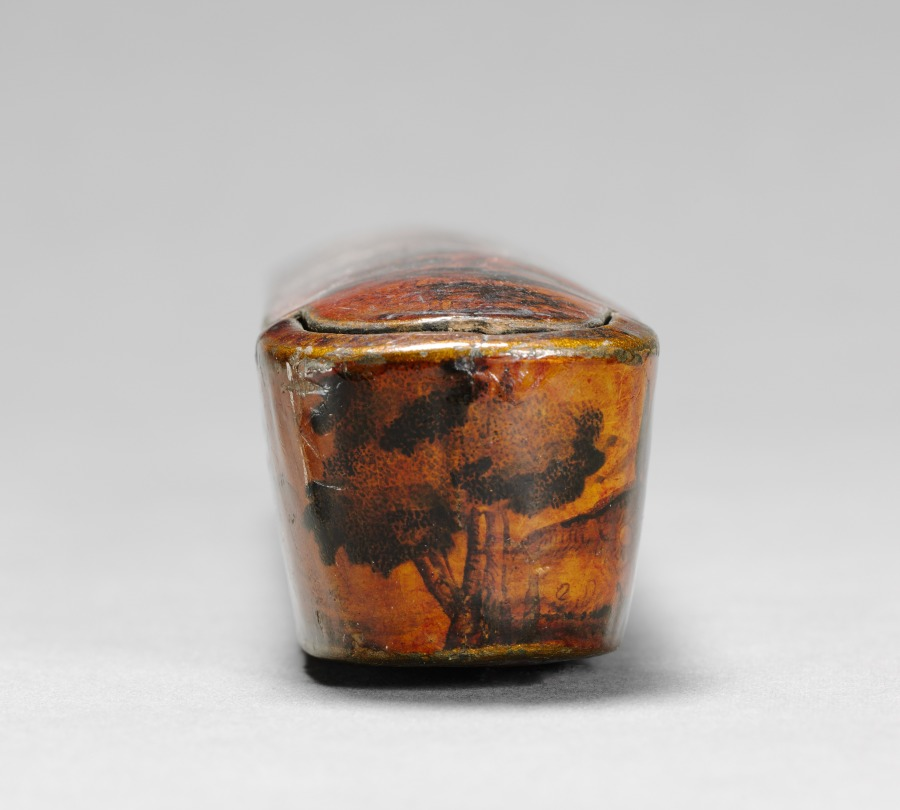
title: Pen and Ink Box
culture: Iran, Qajar period (1779-1925)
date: 1800s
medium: lacquer over papier maché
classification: Lacquer